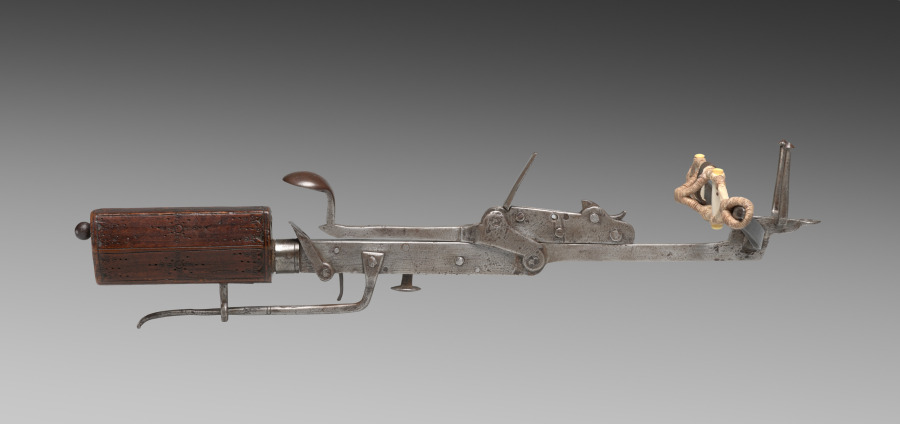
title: Pellet Crossbow for a Child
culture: Germany, early 17th Century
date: c. 1600–1650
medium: wood, bone inlay, steel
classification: Arms and Armor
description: This crossbow, made for the use of a small child, was designed to throw small stones or pellets. The bow string is an accurate replacement.